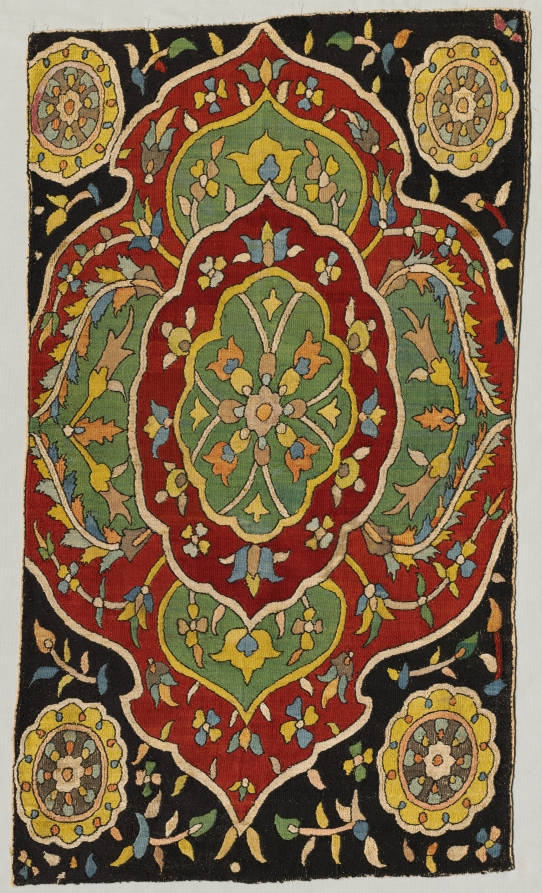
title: Cushion or Divan Cover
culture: Azerbaijan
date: 1600s - 1700s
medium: embroidery: silk on cotton tabby ground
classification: Textile